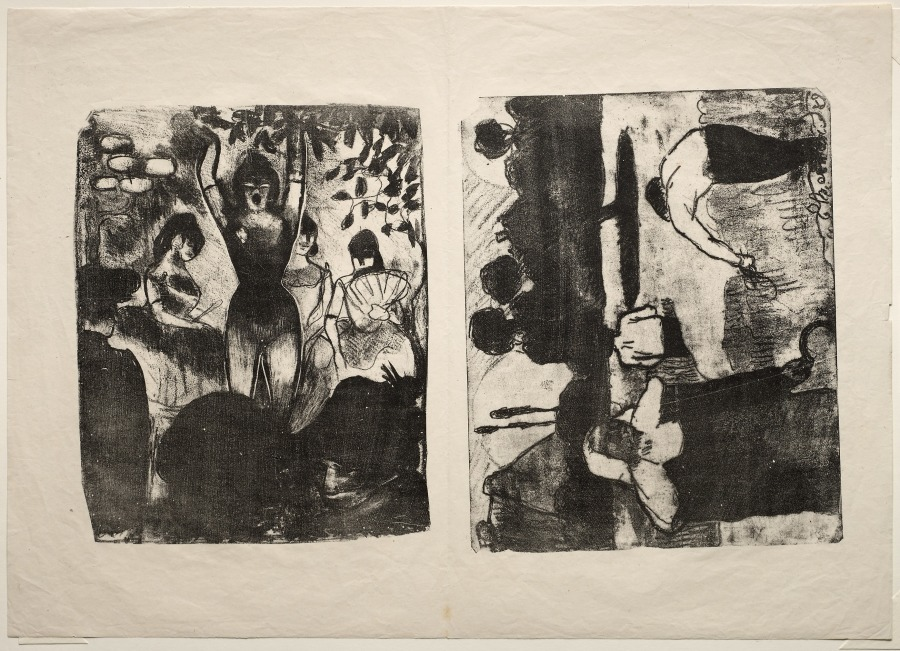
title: Singer at the Café-Concert and The Harvesters (Les Moissonneurs)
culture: France, 19th century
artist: Émile Bernard (French, 1868–1941)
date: 1888, printed 1896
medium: lithograph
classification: Print